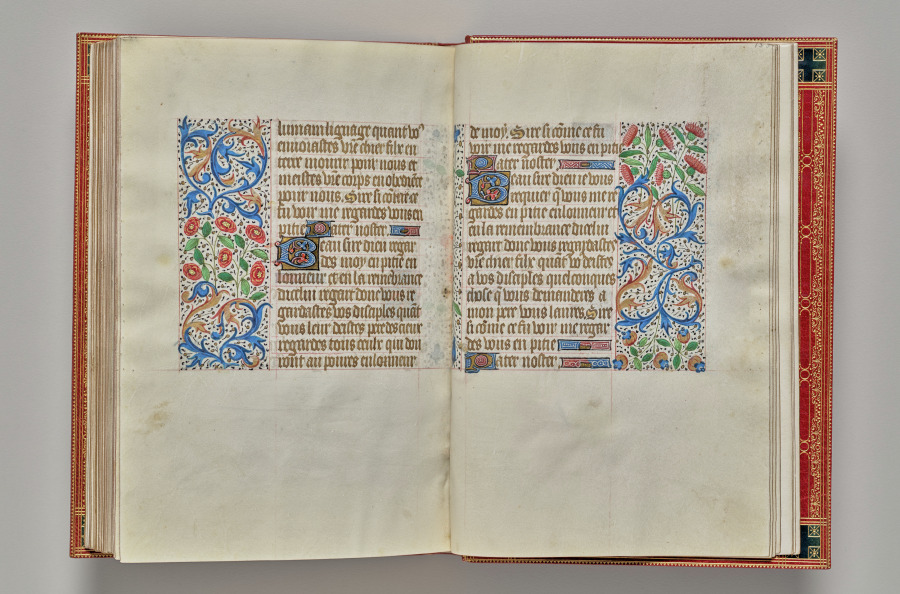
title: Book of Hours (Use of Rouen): fol. 152v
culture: France, Rouen, 15th century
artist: Master of the Geneva Latini (French, active Rouen, 1460–80)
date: c. 1470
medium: ink, tempera, and gold on vellum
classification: Bound Volume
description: In the late 1400s and early 1500s Rouen was an established and important center of book production. The city’s cathedral had a wealthy chapter that spent large sums of money to commission books and to maintain its extensive library. The stationers and booksellers would have likely been concentrated in or near the cathedral precinct. This artist, named after a manuscript now in Geneva, was Rouen’s principal illuminator during the second half of the 1400s.